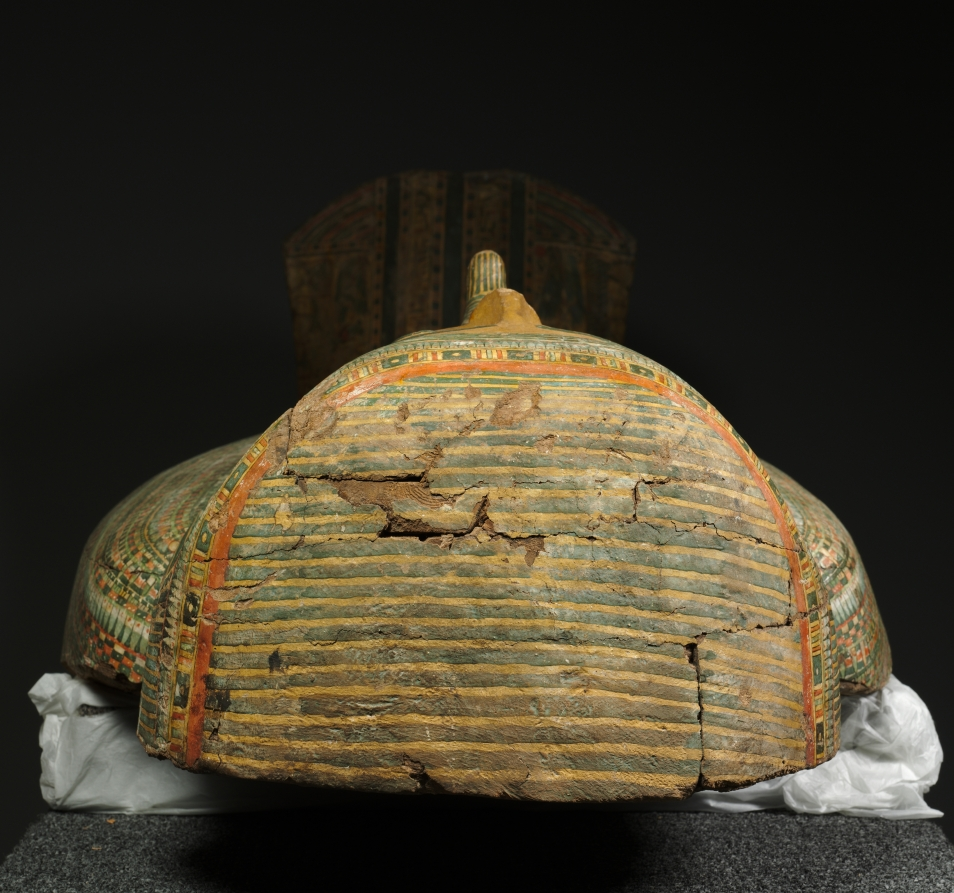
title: Coffin of Bakenmut (lid)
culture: Egypt, Thebes, Third Intermediate (1069–715 BCE), Dynasties 21–22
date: c. 1000–900 BCE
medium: gessoed and painted sycamore fig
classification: Funerary Equipment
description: The coffin of Bakenmut is one of the finest examples of painted wooden coffins made for the priests of Amen and their families at Thebes during Dynasty 21 and early Dynasty 22. The pharaohs of this time were no longer buried in the Valley of the Kings, but instead built tombs in the Delta, far to the north, where they resided. Security was lax in the Theban necropolis. The coffins and funerary goods of the wealthy citizens of Thebes were placed in unmarked and undecorated family tombs cut into the cliffs on the west bank of the Nile. All the care and detail that in more prosperous times were devoted to the decoration of the tomb chapel were now lavished on the elaborately painted coffins. Every available surface is crowded with religious scenes, images of funerary gods and goddesses, protective spells, and magical symbols. The deceased appears mummiform. An elaborate floral collar entirely covers the upper body, exposing only the separately attached hands (now lost). A pair of red "mummy braces" are crossed over the chest, their point of intersection marked by a winged sun disk. The lower body is covered with tiny figures modeled in gesso against a yellow background, which gives the effect of gold inlaid with glass or semiprecious stone. The decoration on the interior features two deified dead kings of Dynasty 18. Although these rulers had lived centuries before, memory of their greatness was still very much alive. The main scene near the top depicts Tuthmosis III, the great military pharaoh, who lived 500 years before Bakenmut. Posed as a mummy, the ruler wears a brilliant feathered garment enfolding him with falcon’s wings. The scene below features back-to-back seated images of Amenhotep I, regarded as the patron of the Theban cemetery and worshiped as a local god there.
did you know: Originally another smaller coffin was placed inside this outer coffin and in that the deceased with a mummy board would have rested.